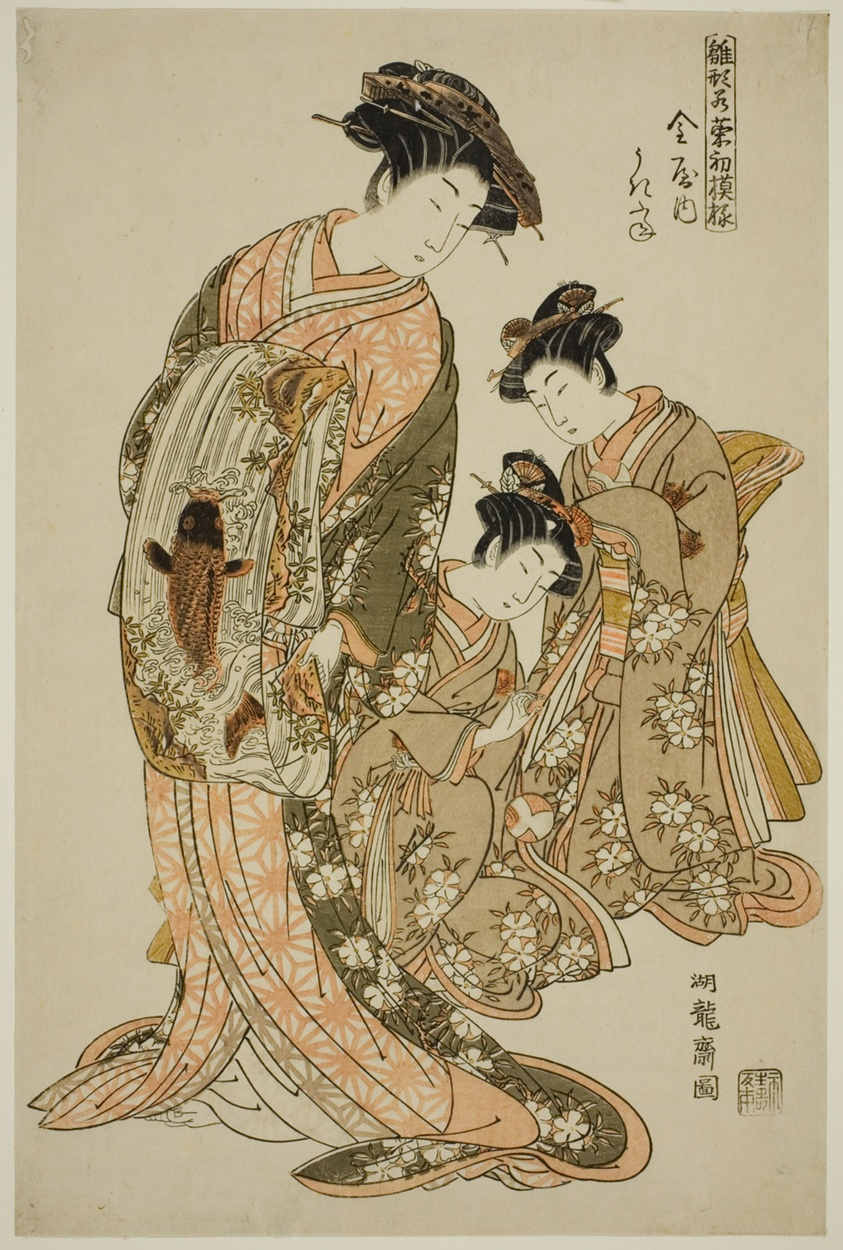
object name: Print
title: Ukifune of the Kanaya, from the series "Models for Fashion: New Designs as Fresh as Young Leaves (Hinagata wakana hatsu moyo)"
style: Japanese (culture or style)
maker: Isoda Koryusai (Japanese, 1735-1790)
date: c. 1776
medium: Color woodblock print; oban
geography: Japan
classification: woodblock print; print; asian art